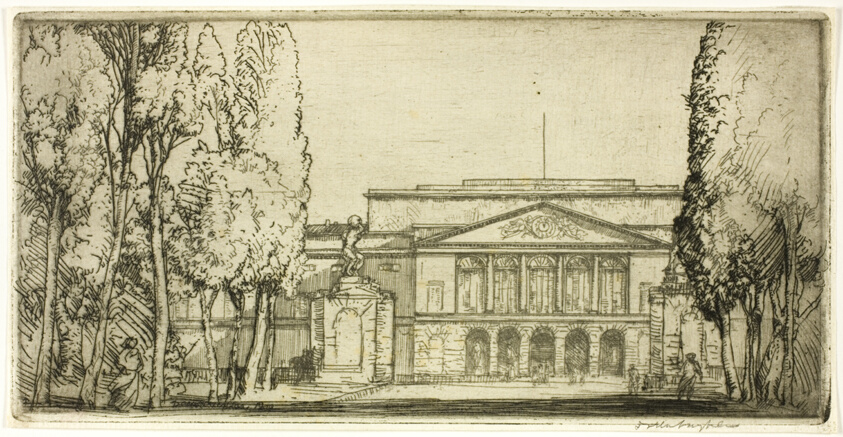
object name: Print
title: Poggio Imperiale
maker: Donald Shaw MacLaughlan (American, born Canada, 1876-1938)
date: 1909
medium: Etching in black on cream laid paper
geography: United States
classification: etching; print; prints and drawing